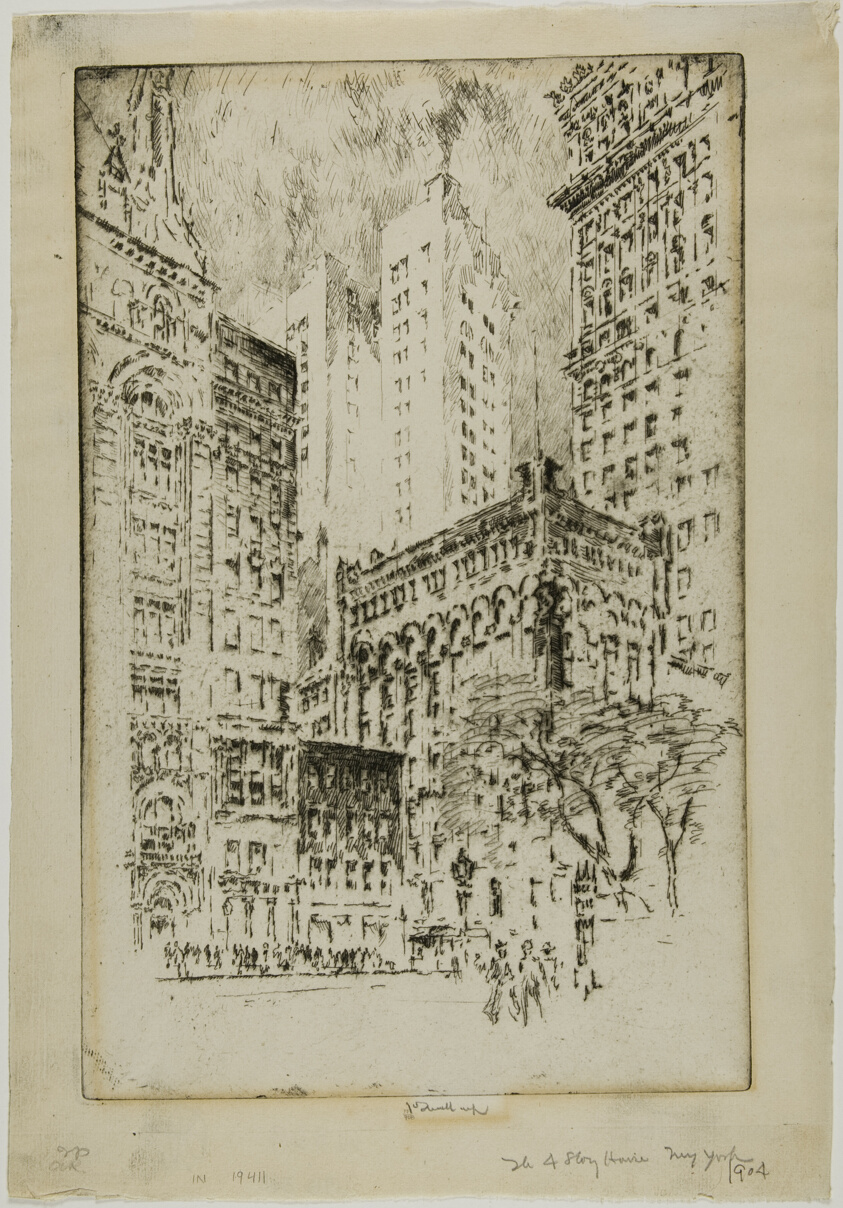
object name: Print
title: Four Story House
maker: Joseph Pennell (American, 1857-1926)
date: 1904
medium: Etching on cream wove paper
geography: United States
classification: etching; print; prints and drawing